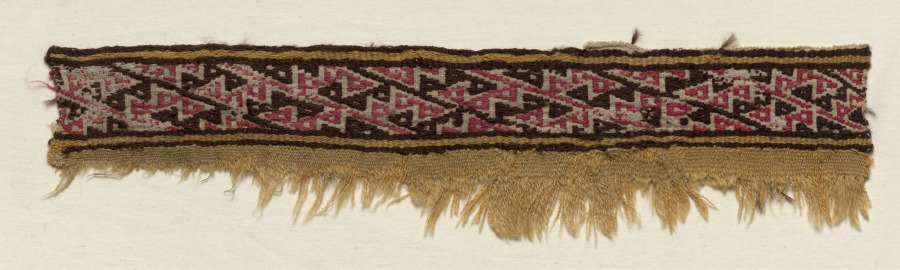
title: Four Border Strips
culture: Peru, Central Coast, Chancay, 12th-15th century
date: c. 1100–1400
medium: plain compound cloth; cotton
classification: Textile